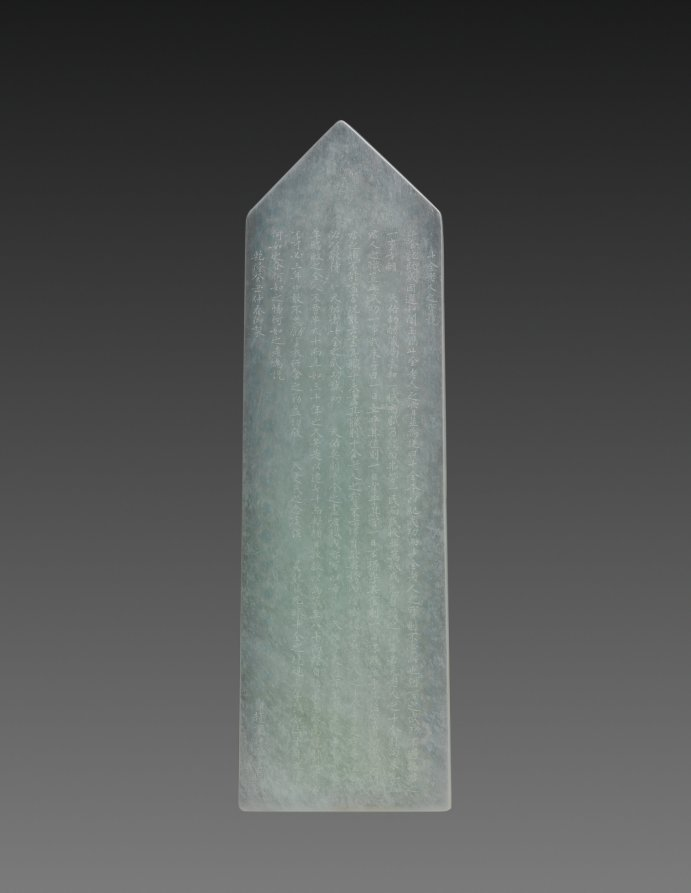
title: Tablet (gui) with Grain Pattern and Imperial Inscription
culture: China, Qing dynasty (1644–1911), Qianlong reign (1736–95)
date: 1793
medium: translucent white jade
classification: Jade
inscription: The Qianlong emperor's essay "On the Seal of the Old Man of the Ten Accomplishments" is inscribed on the reverse of the scepter. The inscription is signed and dated: 乾隆癸丑仲春御製 [Written by Emperor Qianlong in the middle of spring 1793, the guichou year].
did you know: The Qianlong emperor's essay "On the Seal of the Old Man of the Ten Accomplishments" is inscribed on the reverse of the scepter.